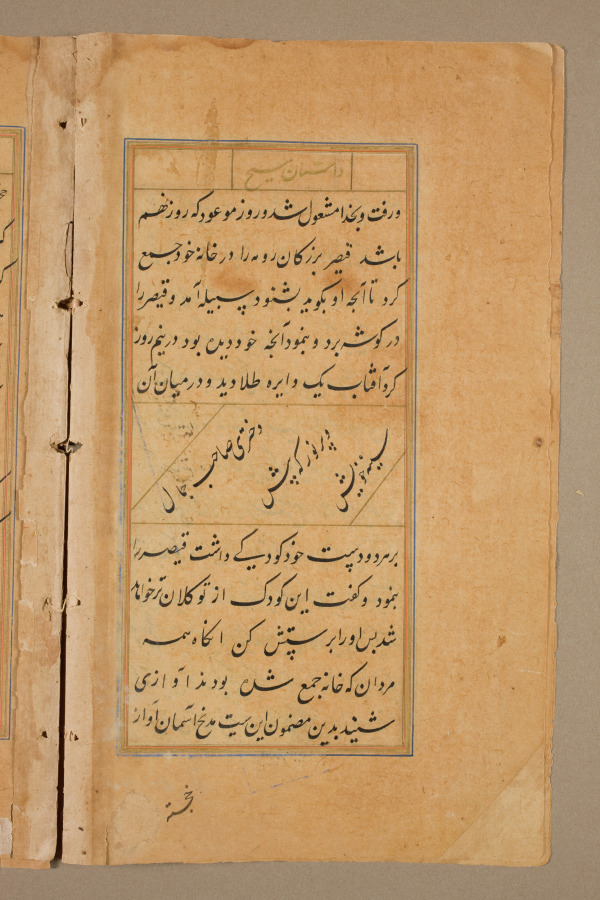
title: Text page from a Mirror of Holiness (Mir’at al-quds) of Father Jerome Xavier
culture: Mughal India, Allahabad, made for Prince Salim (1569–1627)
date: 1602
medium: Ink and gold on paper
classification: Manuscript